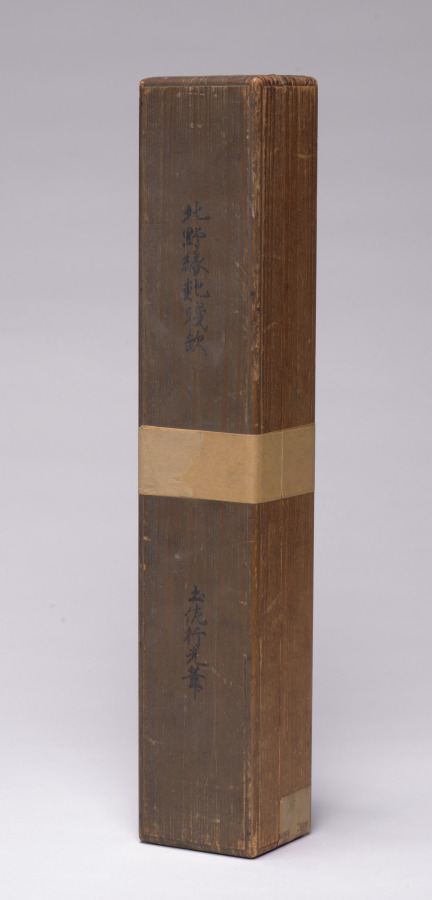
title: Stork, Sun, and Pine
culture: Japan, Edo period (1615–1868)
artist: Utagawa Hiroshige II (Japanese, 1826–1869)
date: c. 1839–1864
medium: color woodblock print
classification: Print